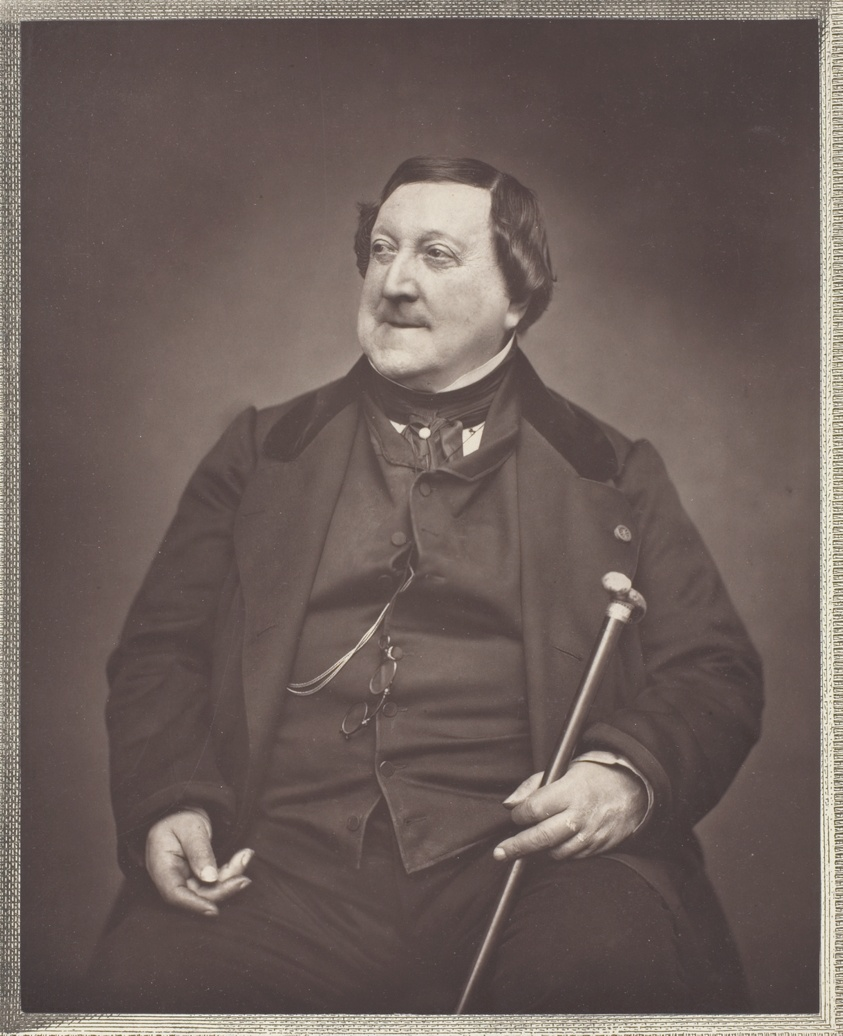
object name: Photograph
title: Gioachino Antonio Rossini (Italian composer, 1792-1868)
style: 19th century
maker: Étienne Carjat; French, 1828–1906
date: 1862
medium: Woodburytype, from the periodical “Galerie Contemporaine Littéraire, Artistique” (1876), volume 3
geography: France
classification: woodburytype; photomechanical process; photography; photograph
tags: Collected by Hugh Edwards, Paris, Contemporaine Littéraire